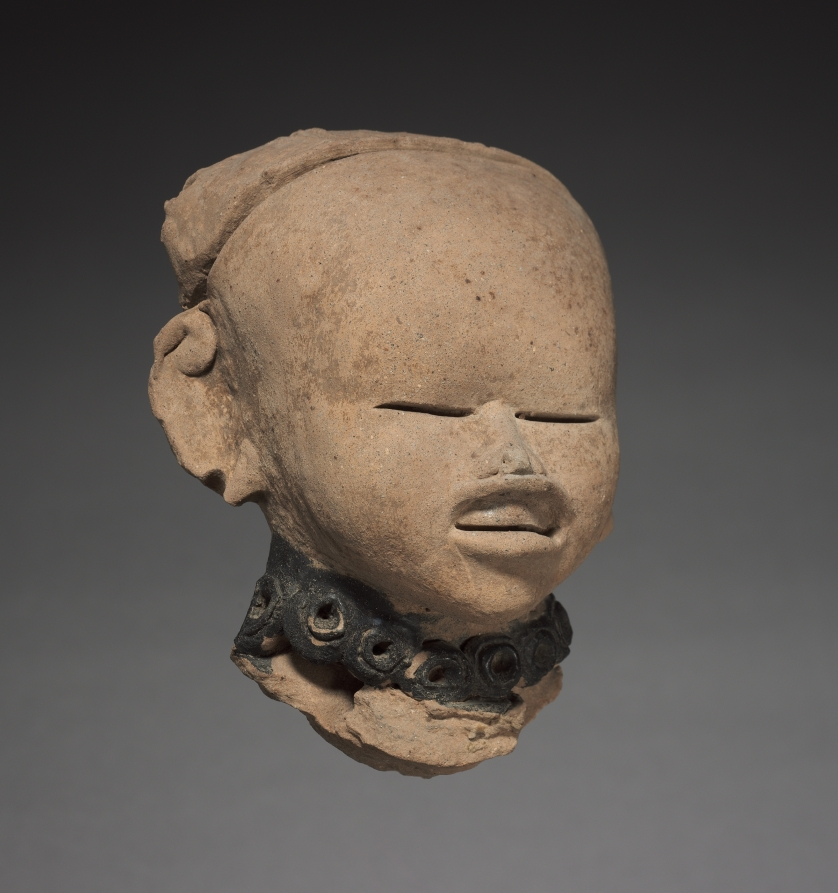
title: Smiling Head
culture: Mexico, Classic Veracruz (Totonac or Tajin)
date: 600–1100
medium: terracotta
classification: Sculpture